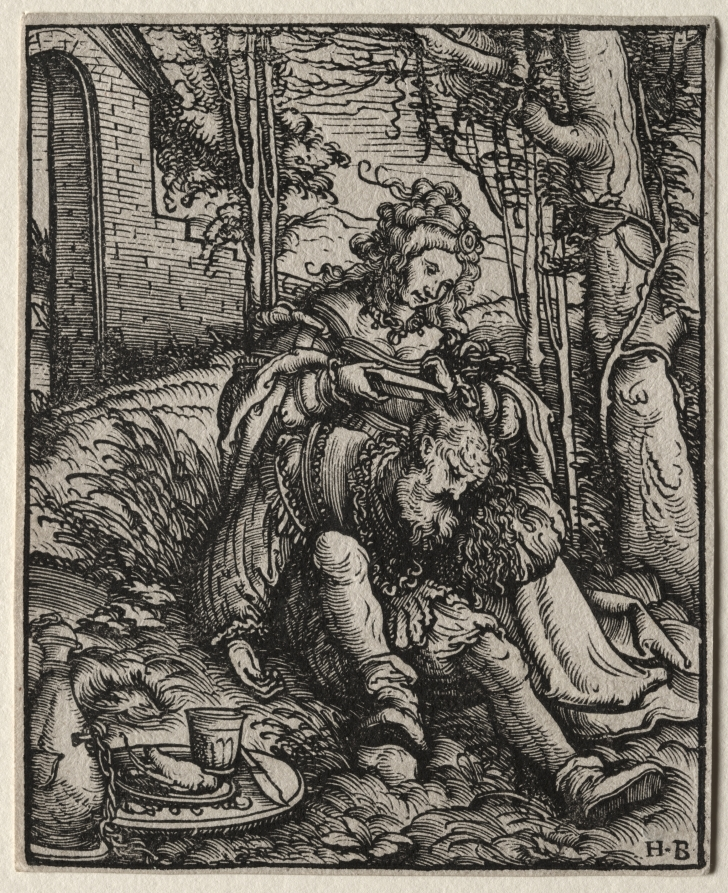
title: Samson and Delilah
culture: Germany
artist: Hans Burgkmair (German, 1473–1531)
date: 1519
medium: woodcut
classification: Print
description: Samson was a man of immense strength and a Nazarite, an Israelite who took a pious oath not to cut his hair or drink alcohol. Bribed by the Philistines (enemies of the Israelites), Delilah—Samson’s lover—cut his hair after discovering that it was the source of his strength. In Hans Brosamer’s rendition, Samson has fallen asleep on Delilah’s lap as she cuts his hair while the Philistines enter. A large chalice and ewer nearby reveal the role of wine in his slumber. Hans Burgkmair similarly emphasized the importance of wine to the plot with a single beaker. The story was popular in Protestant northern Europe, where it was understood as a cautionary tale about the dangers of temptation and neglecting one’s spiritual commitments.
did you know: Scissors like those wielded by Delilah in this print have been used for personal grooming since ancient times.